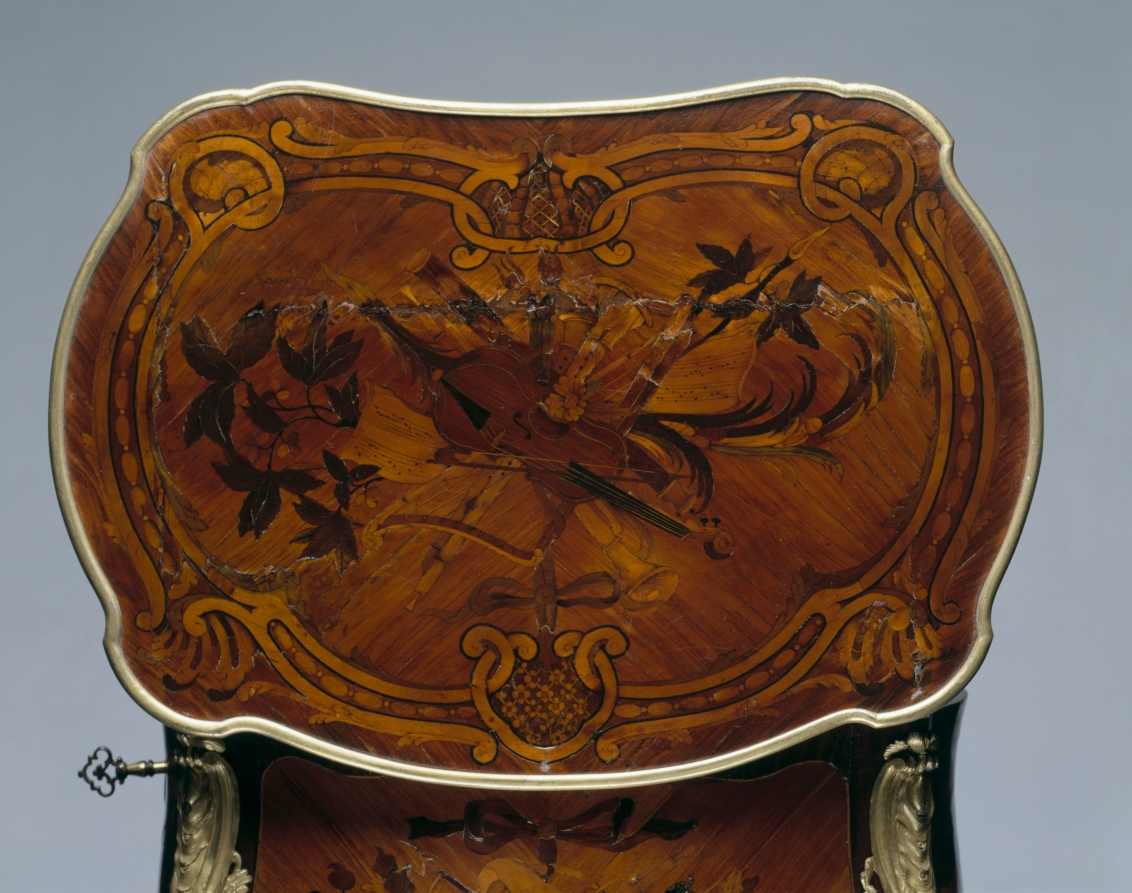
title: Work Table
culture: France, Paris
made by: Bernard Peridiez (French, d. 1757)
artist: or Gerard Peridiez (French, born c.1730)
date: 1700–1799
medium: wood marquetry with gilt bronze mounts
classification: Furniture and woodwork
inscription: signed under shelf: B. Peridiez JNE.